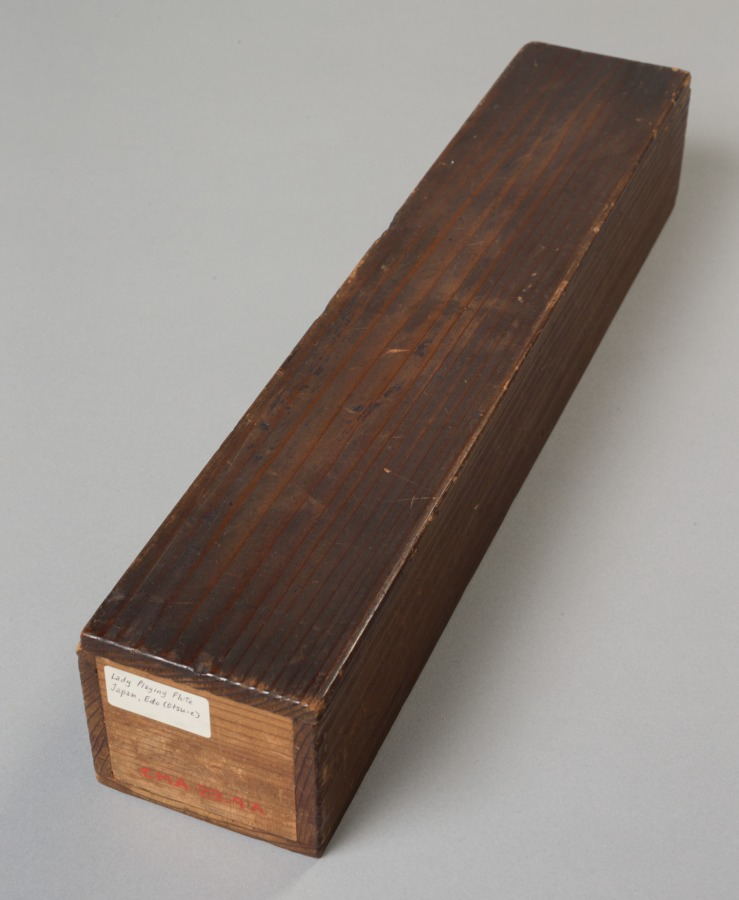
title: Woman as an Itinerant Monk: Onna Komuso (Otsu-e)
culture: Japan, Edo period (1615–1868)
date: late 1600s-early 1700s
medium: hanging scroll; ink and color on paper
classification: Painting